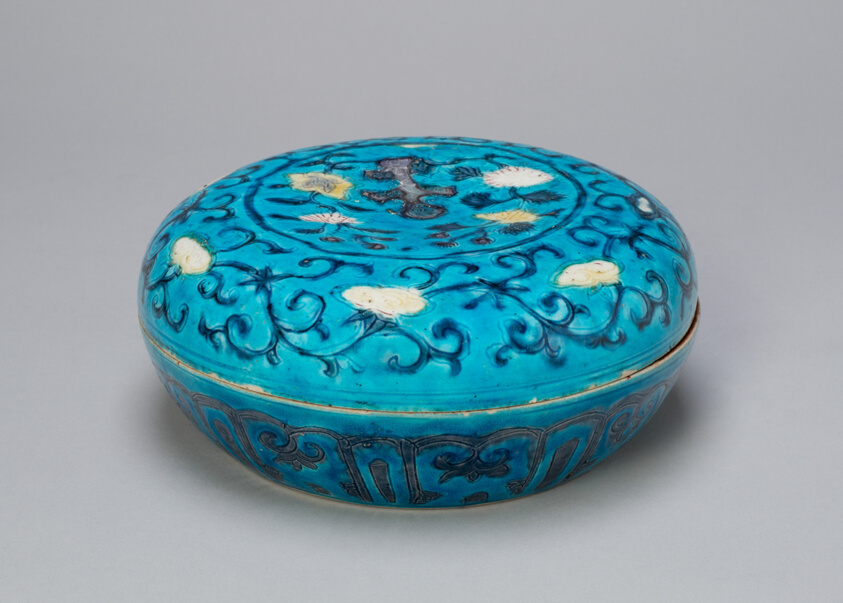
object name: Vessel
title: Circular Covered Box with Floral and Lingzhi Mushroom Scrolls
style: Chinese (culture or style)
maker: China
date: Ming dynasty (1368–1644), 16th century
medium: Fahua-type ware; porcelain with underglaze incised decoration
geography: China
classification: porcelain; asian art; ceramics; vessel